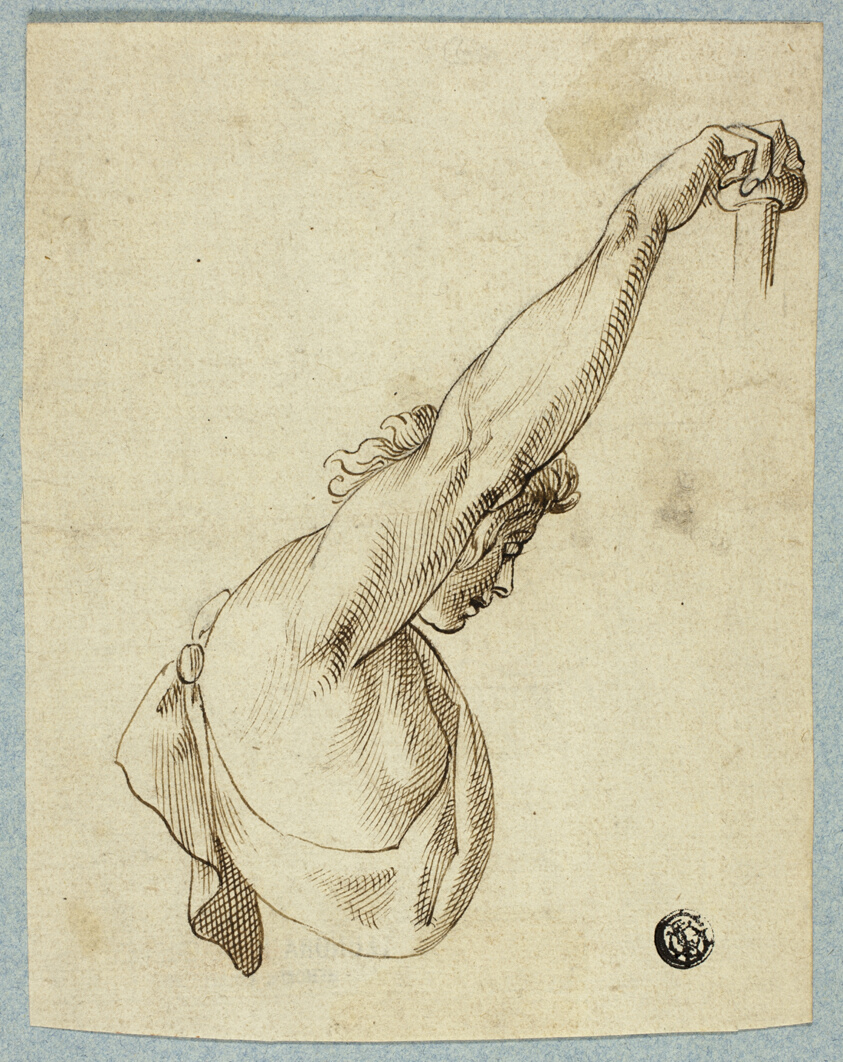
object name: Drawing and Watercolor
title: Upper Torso with Upstretched Arms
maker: Unknown artist (possibly 18th century)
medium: Pen and brown ink on cream laid paper, tipped on blue wove paper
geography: Unknown Place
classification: pen and ink drawings; drawings (visual works); prints and drawing